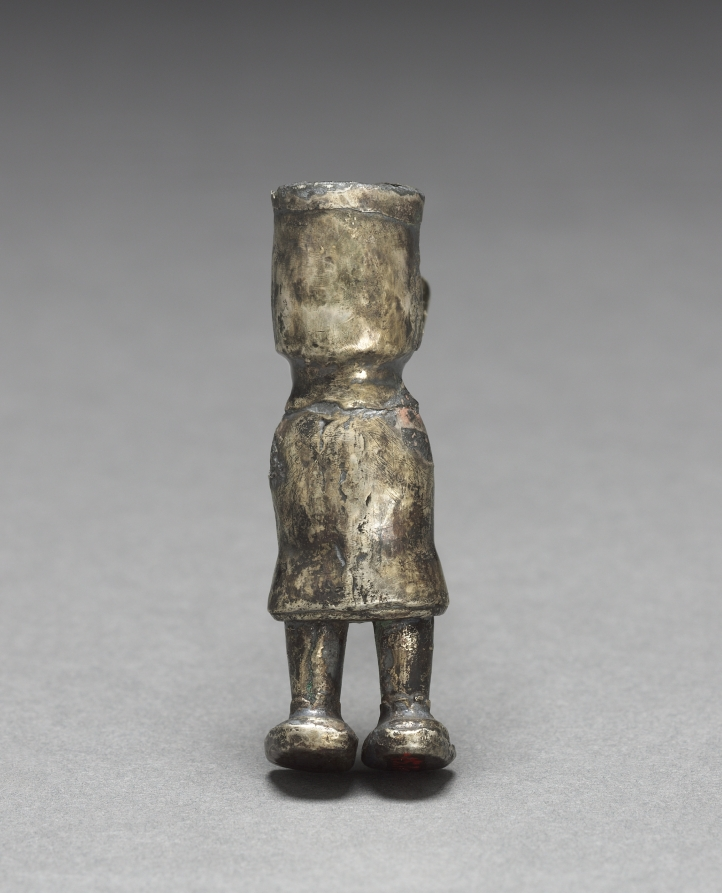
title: Figure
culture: Peru, Lambayeque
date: 1000–1532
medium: silver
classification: Metalwork